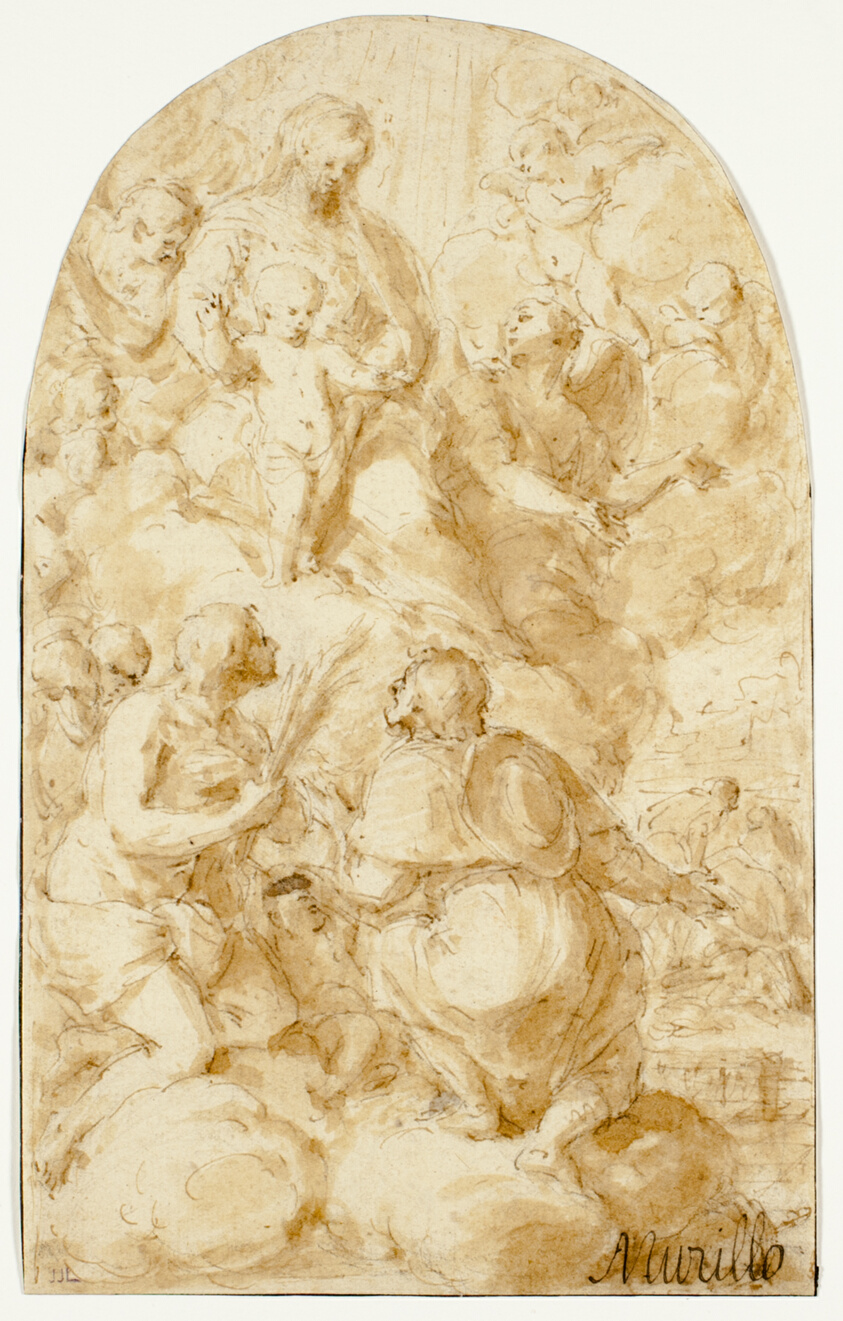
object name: Drawing and Watercolor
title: Virgin Mary with the Christ Child in the Clouds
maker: Attributed to Bartolomé Estéban Murillo; Spanish, 1618-1682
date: 1601-1700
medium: Ink and wash on paper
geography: Spain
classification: ink or chalk wash; drawings (visual works); prints and drawing